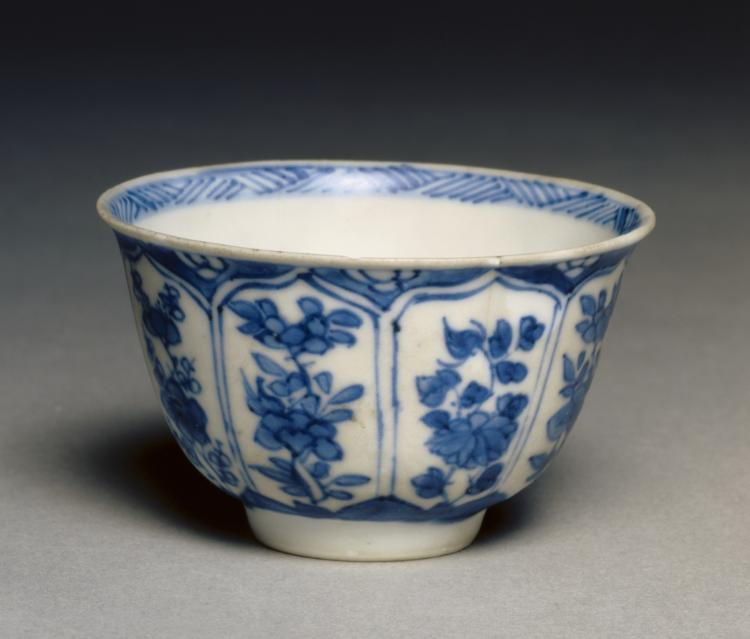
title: Tea Cup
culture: China, Qing dynasty (1644-1911)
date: c. 1690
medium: porcelain with blue and white decoration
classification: Ceramic